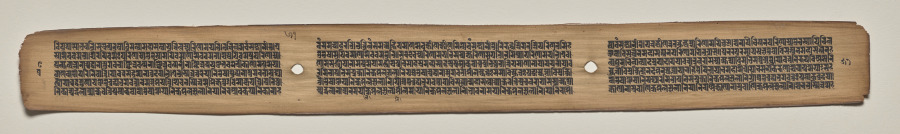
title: Text, folio 51 (verso), from a Manuscript of the Perfection of Wisdom in Eight Thousand Lines (Ashtasahasrika Prajnaparamita-sutra)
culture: Eastern India, Bihar, Vikramashila Monastery. Painting: Nepal, Kathmandu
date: Sunday, September 14, 1119 (year 239 of the Newar Samvat in the month of Ashvina)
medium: gum tempera and ink on palm leaves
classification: Painting